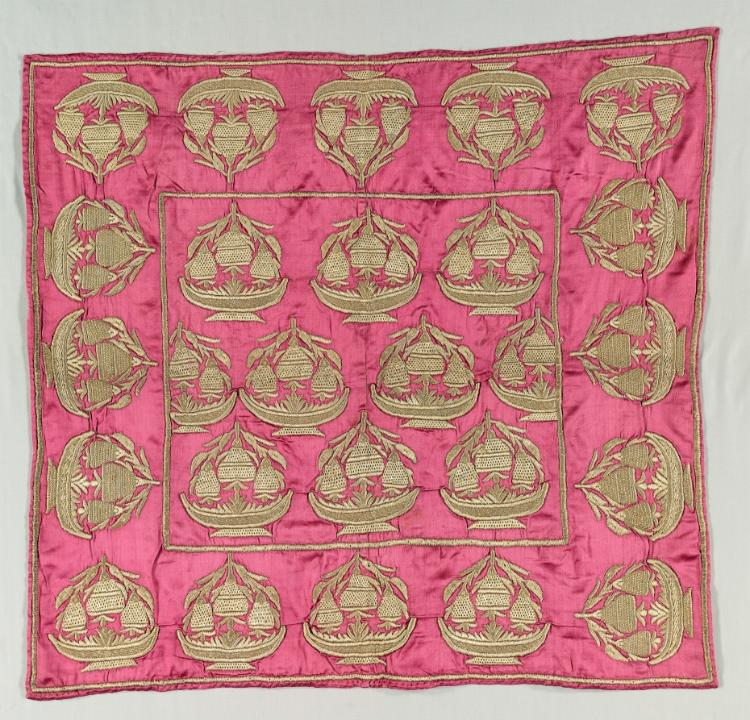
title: Embroidered Square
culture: Turkey, 18th-19th century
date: 18th-19th century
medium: embroidery: gold filé laid over cotton thread, couched at edges by cotton, on silk ground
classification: Embroidery